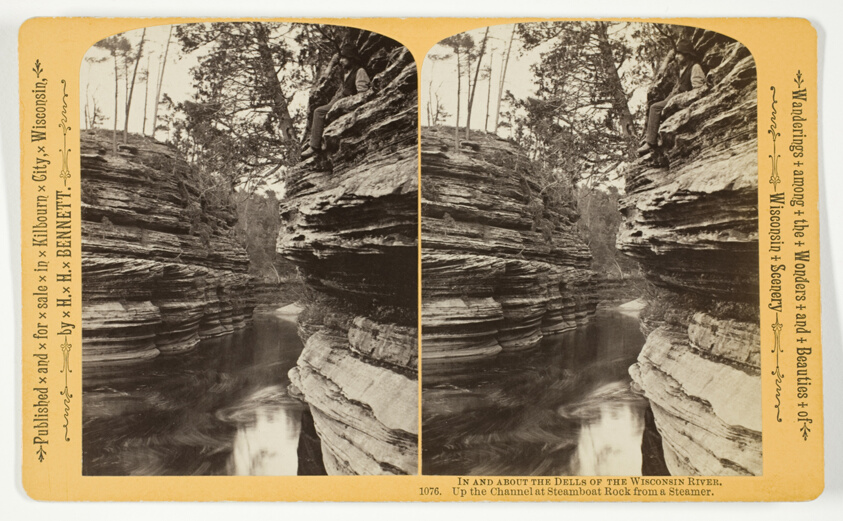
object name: Photograph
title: Up the Channel at Steamboat Rock from a Steamer, No. 1076 from the series "In and About the Dells of the Wisconsin River"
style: 19th century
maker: Henry Hamilton Bennett (American, born Canada, 1843–1908)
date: 1870/1908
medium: Albumen print, stereo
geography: United States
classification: stereograph (albumen); albumen silver print; photographic process; photography; photograph